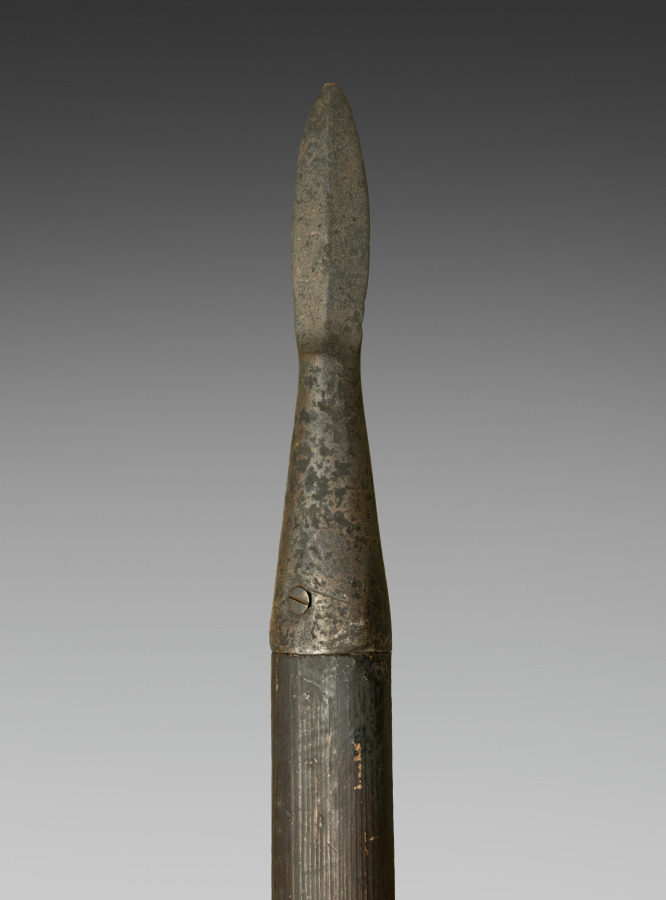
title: Tilting Lance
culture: Germany, late 19th-early 20th Century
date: c. 1875–1925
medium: steel and wood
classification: Arms and Armor